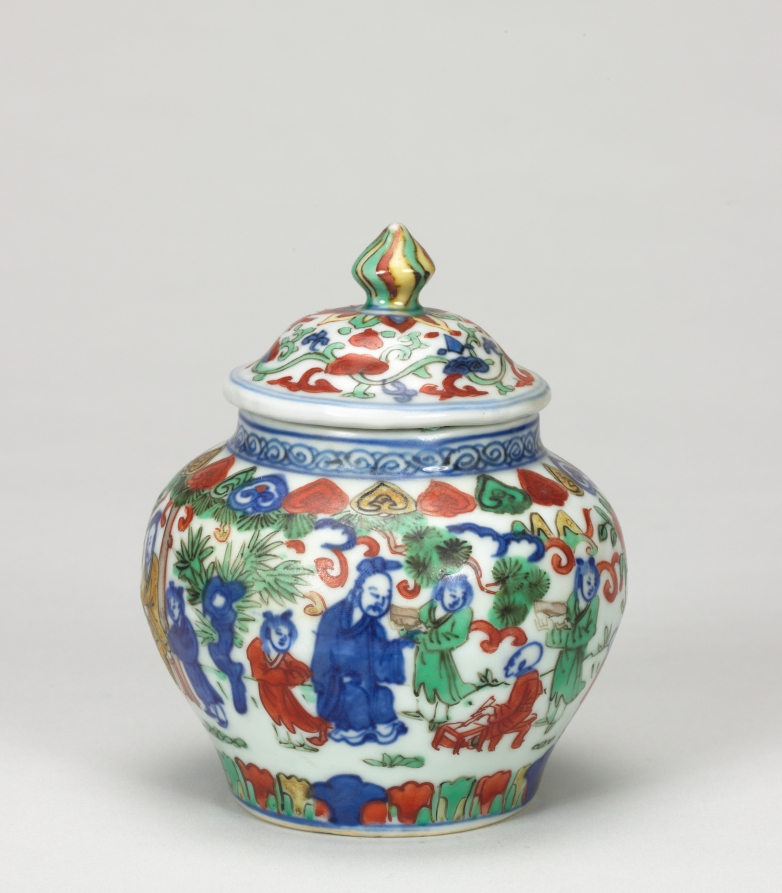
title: Covered Jar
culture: China, Jiangxi province, Jingdezhen kilns, Ming dynasty (1368-1644), Wanli reign (1573-1620)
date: 1573–1620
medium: porcelain with blue underglaze decoration and overglaze enamels in red, green, and yellow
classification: Ceramic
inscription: 大明萬曆年製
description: In the Ming (1368–1644) and Qing (1644–1911) dynasties, luxury items became more affordable to larger parts of the society, including women, merchants, and literati in non-official positions. Imperial patronage and a growing urban population encouraged consumption of luxury goods and local craftmanship. This covered porcelain jar has blue underglaze and overglaze in red, green and blue enamels. It shows Ming dynasty advancements in porcelain decoration and the creative mind of the talented artisans who made it.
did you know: This jar is painted with 16 figures of all ages enjoying a garden setting.